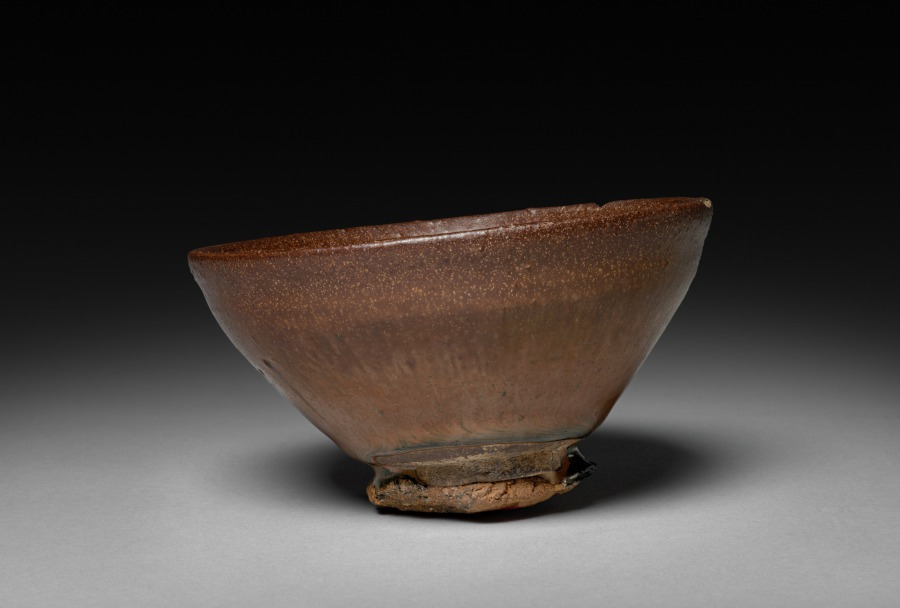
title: Tea Bowl: Jian ware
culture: China, near Shui ch'i, Song dynasty (960-1279)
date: 960–1279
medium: stoneware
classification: Ceramic